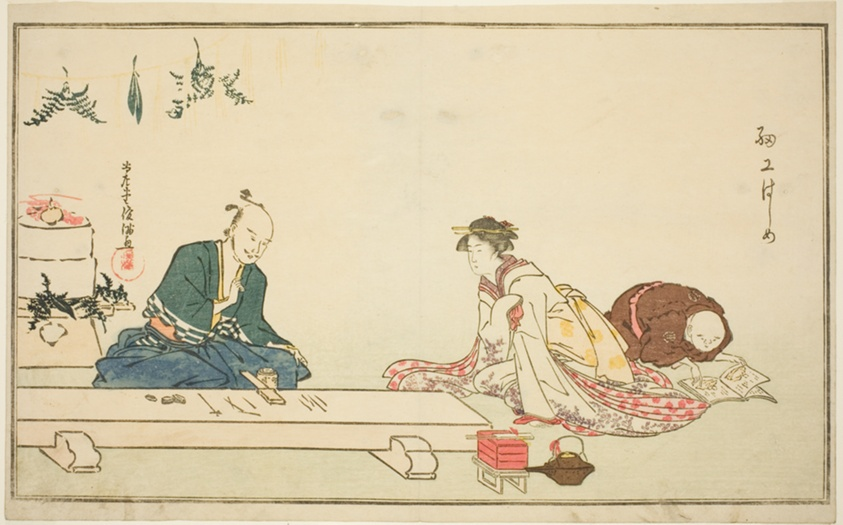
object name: Print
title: The First Work in the New Year (Saiko hajime)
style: Japanese (culture or style)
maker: Kubo Shunman (Japanese, 1757–1820)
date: c. 1790s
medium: Color woodblock print; surimono, sheet from an album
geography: Japan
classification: woodblock print; print; asian art